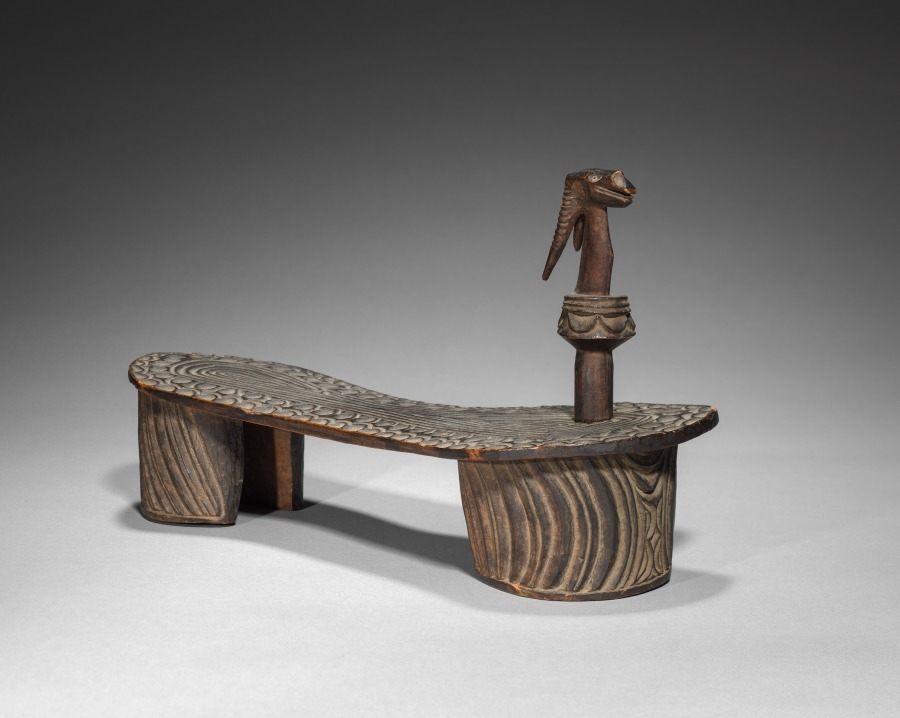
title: Sandal (mtalawanda / mtawanda) or Clog (kiatu cha mti)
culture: Africa, Central Africa, Democratic Republic of Congo, unidentified carver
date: c 1800s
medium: Wood and glass beads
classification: Wood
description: Common in the Indian Ocean region, wooden sandals changed meaning across place and time. This pair’s base elevates the foot as the toes grip an antelope-shaped peg (msuruaki). Crisp geometric sole designs suggest they were rarely worn. East African elites and merchants once had exclusive rights to wooden shoes, wearing elaborate ones only for portraits. Formerly enslaved people living along the coast wore simpler ones from the 1840s onward, adopting elite footwear to assert their liberation. However, slave traders like the Zanzibari “Tippu Tip” (c. 1832–1905) likely brought mitalawanda to Central Africa; stylistic elements of this pair hail from that region.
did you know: This distinctive footwear traveled from Southeast Asia and the Middle East to Africa, first to the Swahili Coast and then further inland to parts of Central Africa. The deity Krishna wears similar shoes (paduka) in an eighteenth-century Indian miniature painting (2003.344).